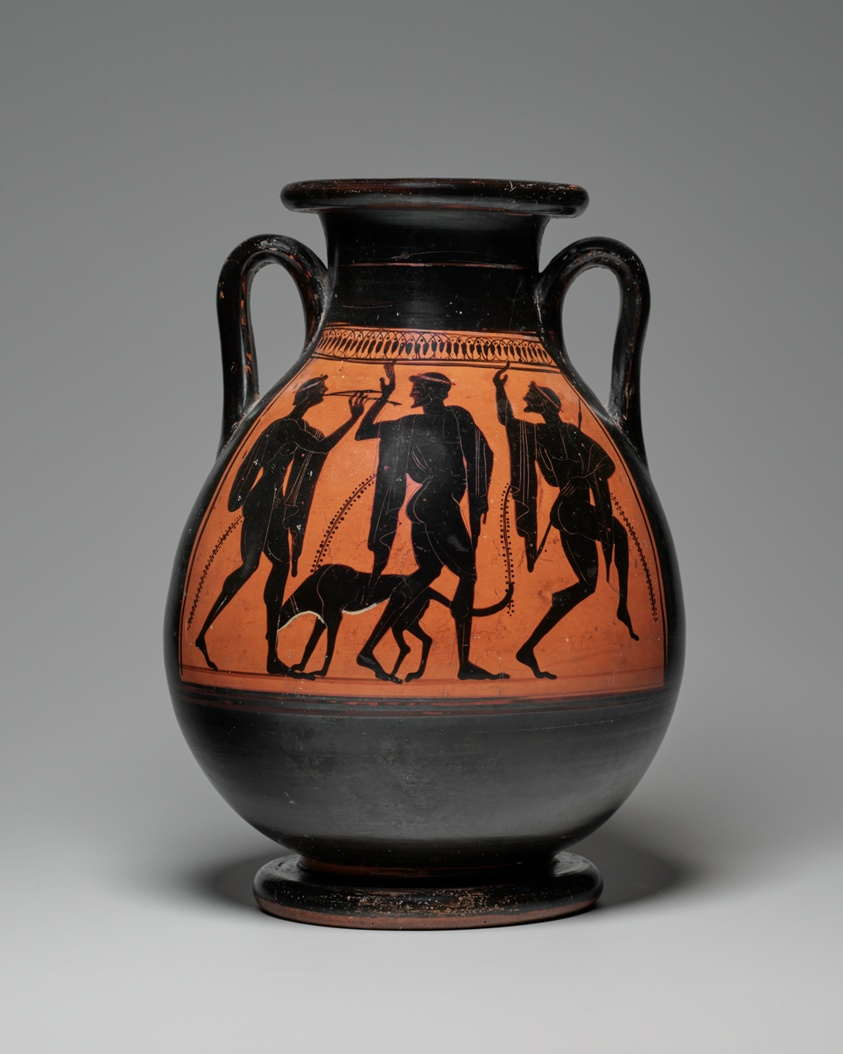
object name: Vessel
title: Pelike (Storage Jar)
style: greek, black-figure, ancient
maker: Greek; Athens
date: about 510-500 BCE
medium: terracotta, black-figure with applied paint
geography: Greece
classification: vessel; ceramics; ancient art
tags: dancing, drinking, music, dogs, instruments, woman